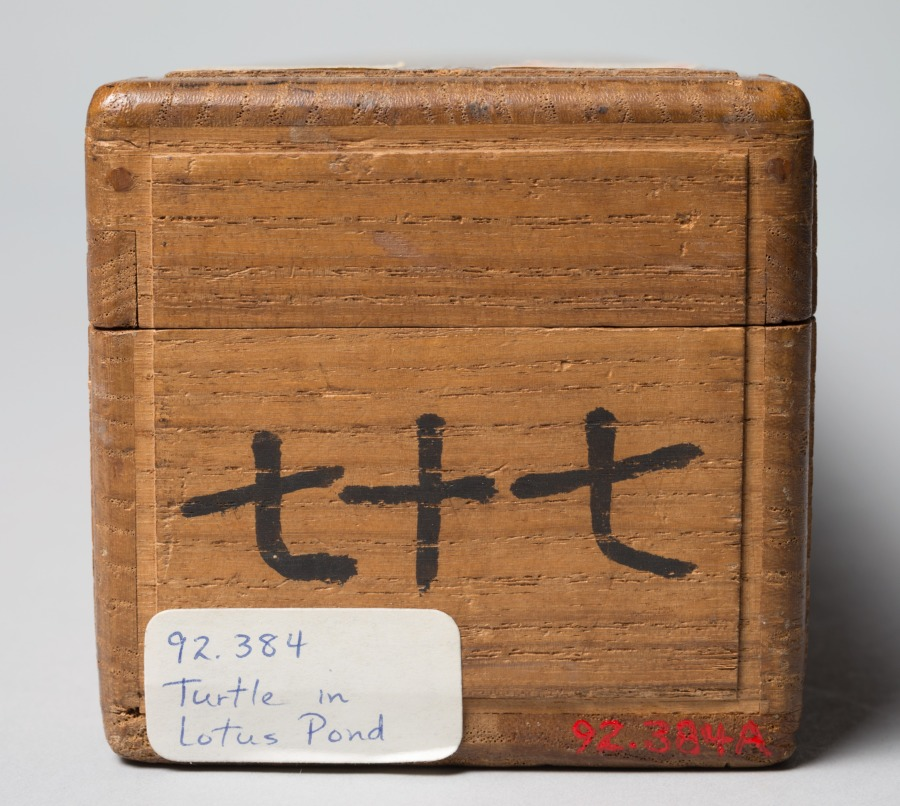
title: Turtle in a Lotus Pond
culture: Japan, Edo period (1615–1868)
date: 1700s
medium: hanging scroll; ink on paper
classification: Painting